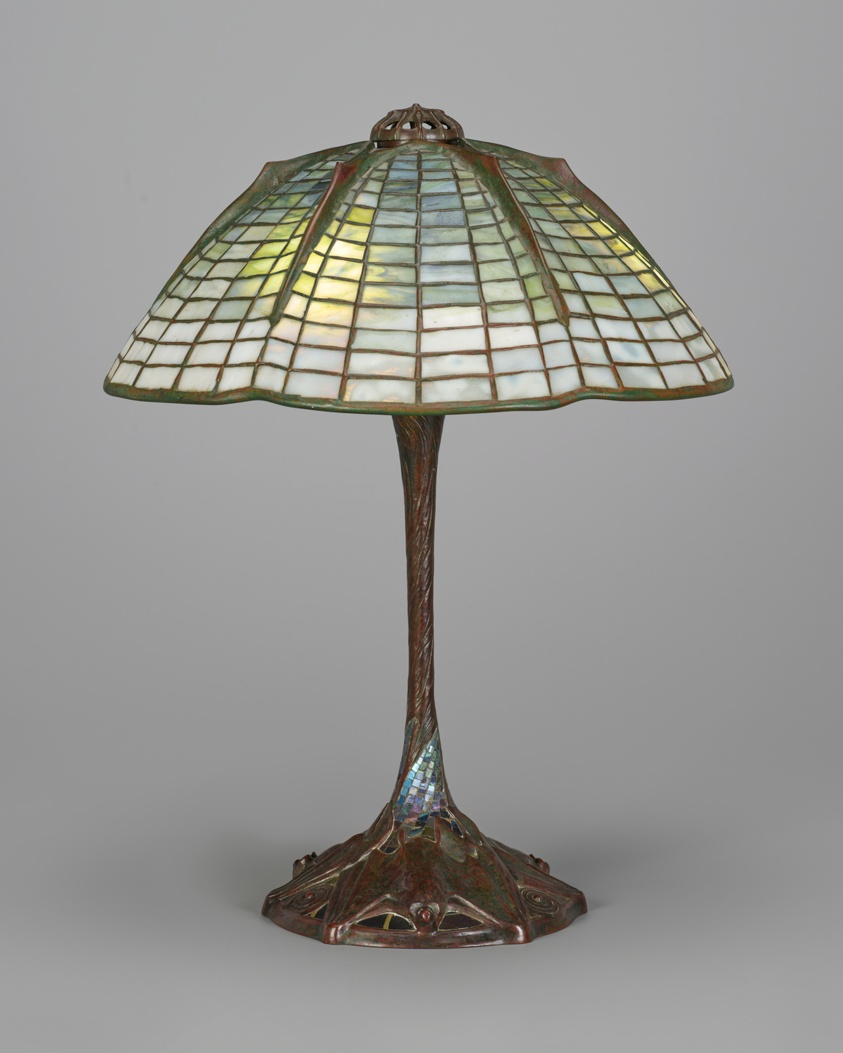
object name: Furnishings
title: Lamp with “Heavy Ribs” Shade and “Bat” Base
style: Arts and Crafts Movement, 20th Century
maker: Tiffany Studios (American, 1902–32); Corona, New York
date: c. 1905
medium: Favrile glass, leaded glass, and bronze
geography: Corona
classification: lamp (lighting device); american decorative arts; decorative arts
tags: bats, mosaic, spiders, spiderwebs